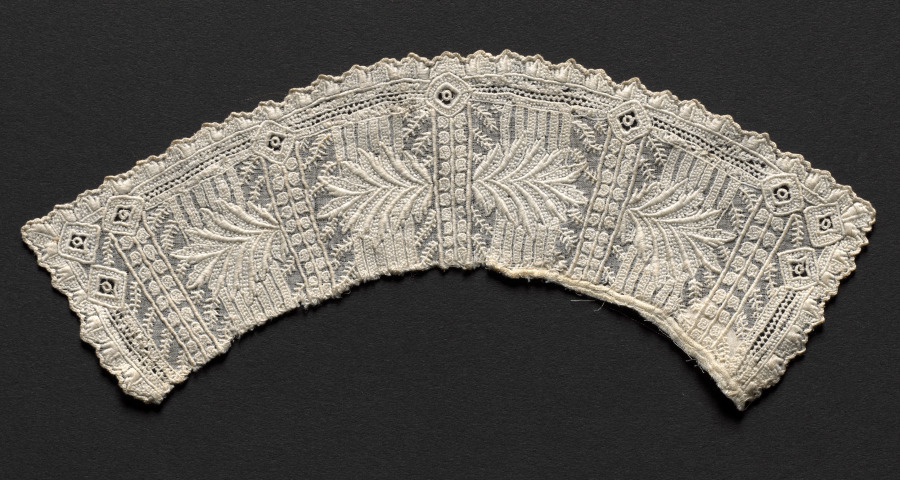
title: Lace Cuff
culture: France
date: 1800s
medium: Plain weave linen: embroidered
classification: Embroidery